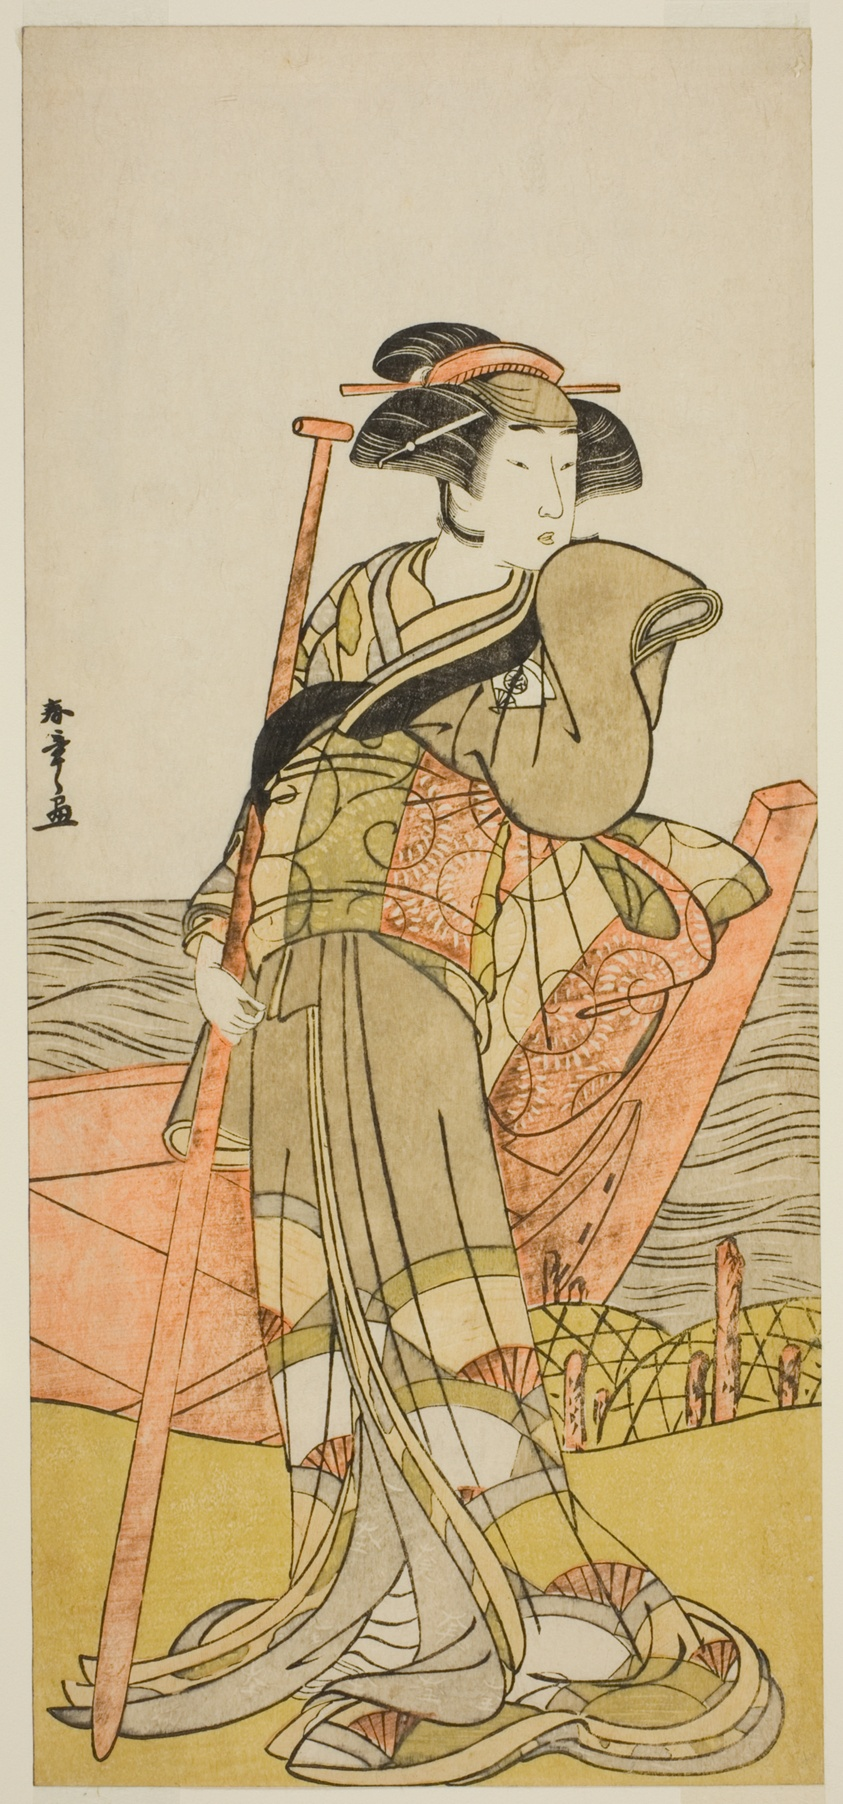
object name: Print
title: The Actor Onoe Matsusuke I as Akoya in the Play Edo Meisho Midori Soga, Performed at the Morita Theater in the Second Month, 1779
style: Japanese (culture or style)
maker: Katsukawa Shunsho 勝川 春章; Japanese, 1726-1792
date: c. 1779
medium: Color woodblock print; hosoban; left sheet of diptych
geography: Japan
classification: print